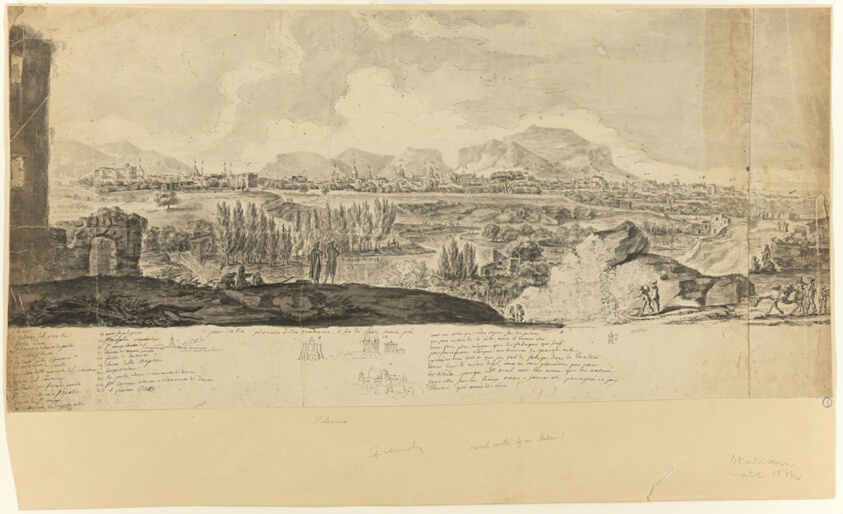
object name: Drawing and Watercolor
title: View of Palermo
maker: Unknown Artist; French, 18th century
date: 1700/1799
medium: Pen and black ink, and brush and black and gray wash, over graphite, on cream laid paper tipped on cream wove paper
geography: France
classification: pen and ink drawings; drawings (visual works); prints and drawing